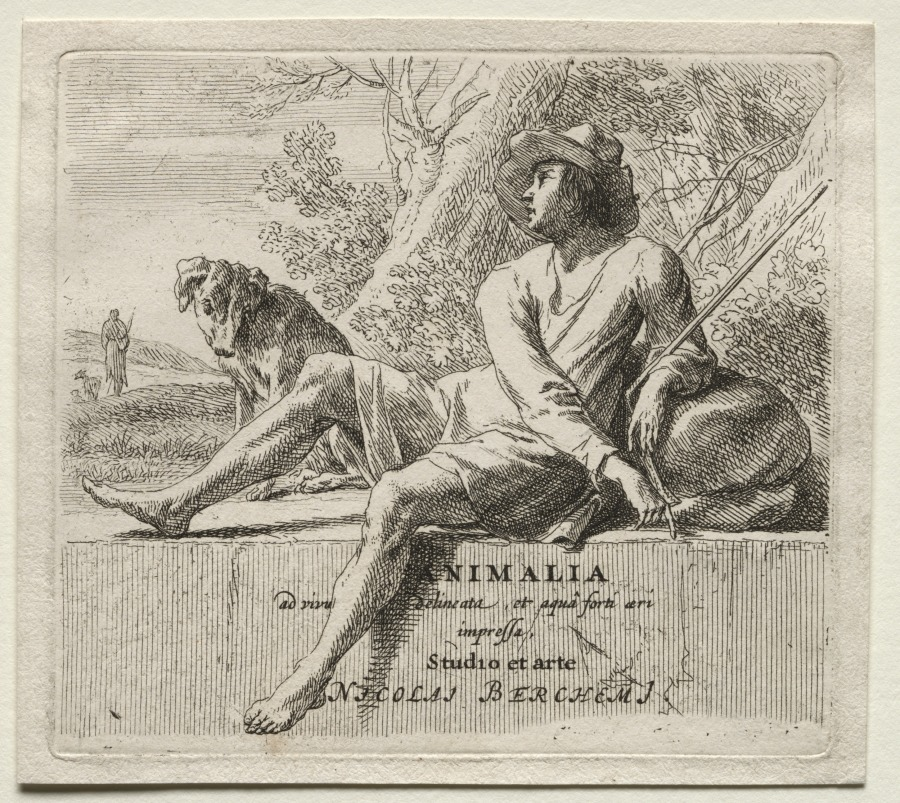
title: Animalia (series)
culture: Netherlands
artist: Nicolaes Berchem (Dutch, 1620–1683)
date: 1635–83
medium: etching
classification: Print